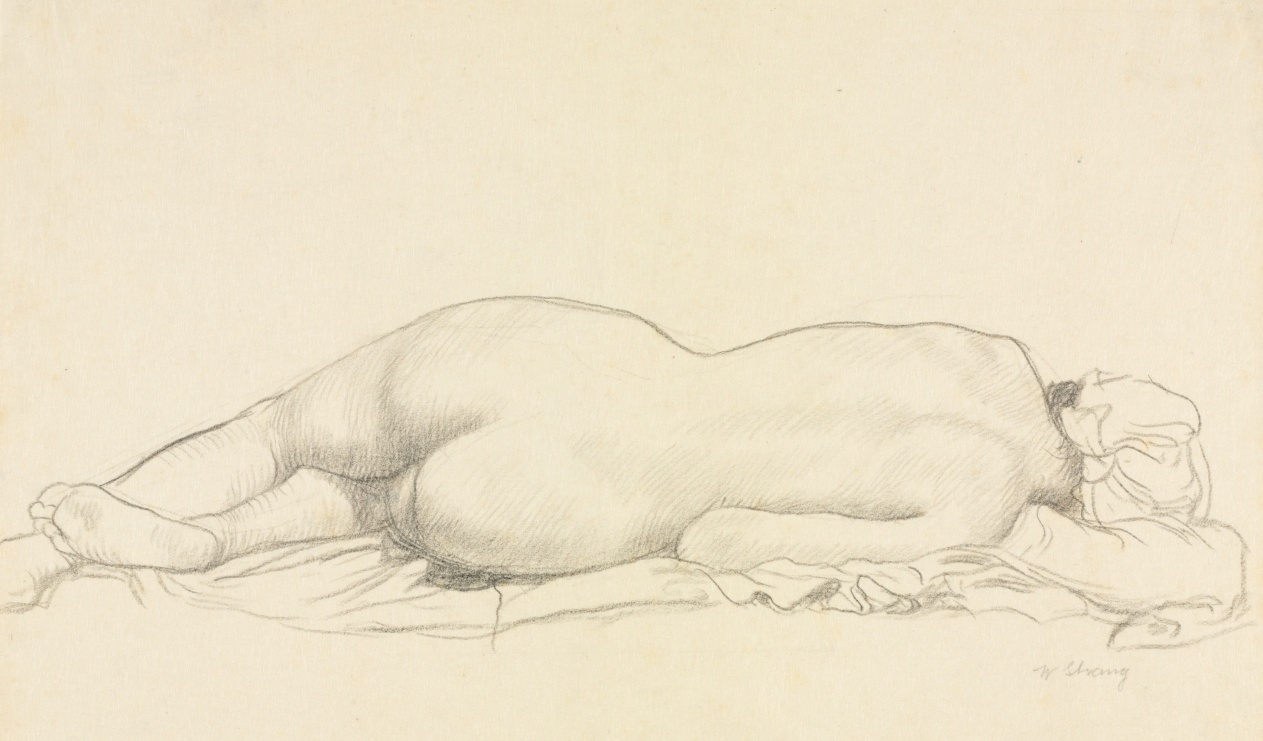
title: Reclining Nude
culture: England, 19th century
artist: William Strang (British, 1859–1921)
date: c. 1879–1921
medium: graphite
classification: Drawing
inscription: In pencil, lower right: "W. Strang (signed)"